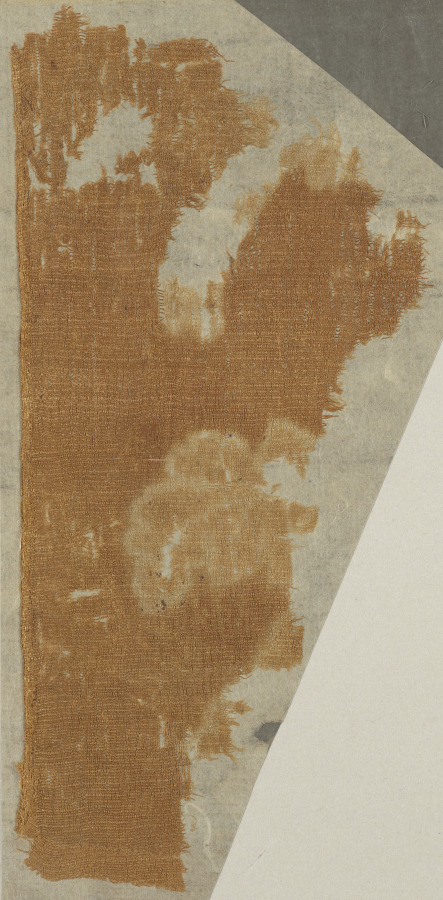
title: Fragment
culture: China, Tang dynasty (618–907) or Japan, Nara period (710–794)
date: 700s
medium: gauze printed; silk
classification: Textile